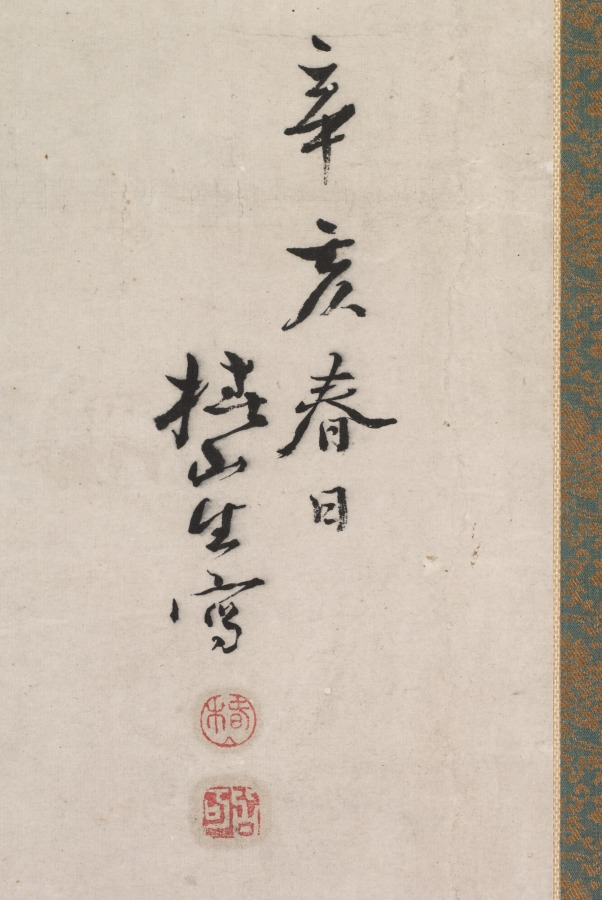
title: Banana Plant and Chrysanthemum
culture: Japan, Edo period (1615–1868)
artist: Tsubaki Chinzan (Japanese, 1801–1854)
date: c. 1820–54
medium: hanging scroll; ink and color on paper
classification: Painting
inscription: artist's inscription and two seals middle right side.